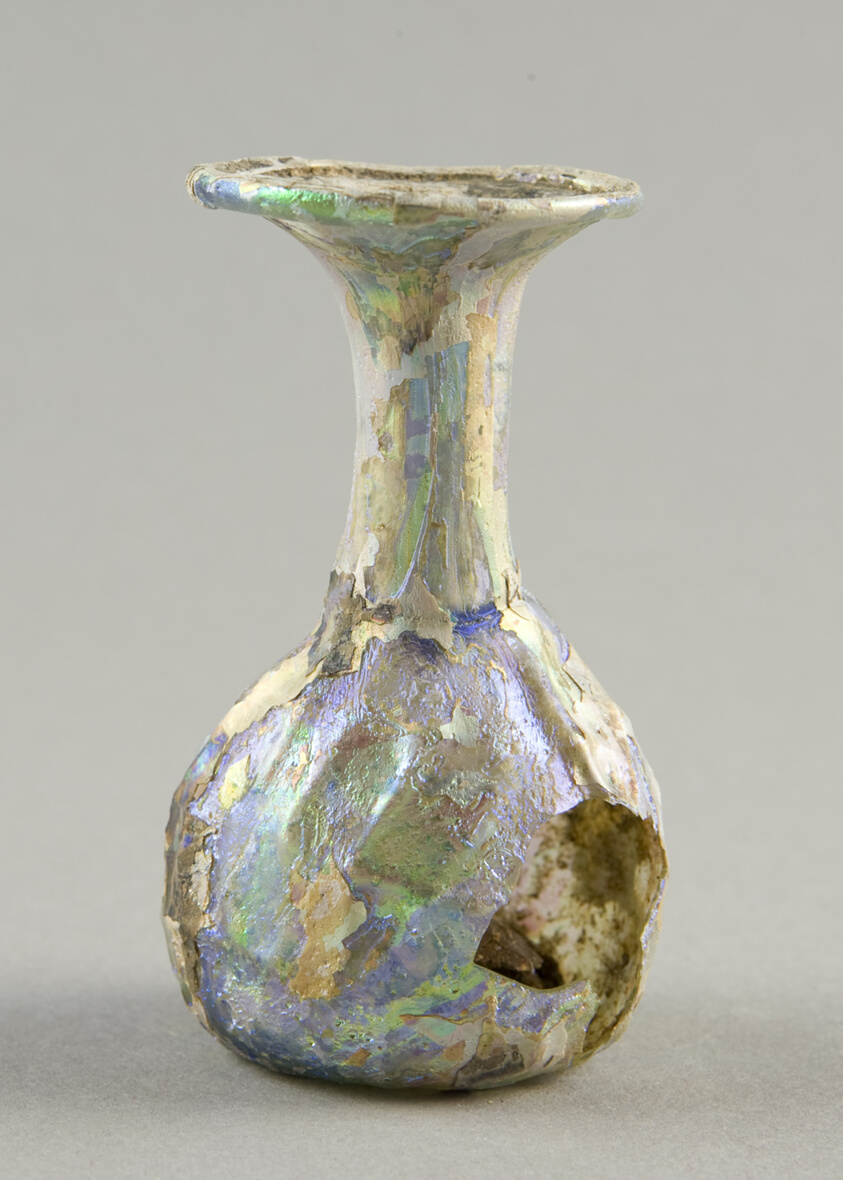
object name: Vessel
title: Bottle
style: ancient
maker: Roman or Byzantine; Eastern Mediterranean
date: 2nd-6th century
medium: Glass, blown technique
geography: Mediterranean Region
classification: bottle; glass; vessel; ancient art